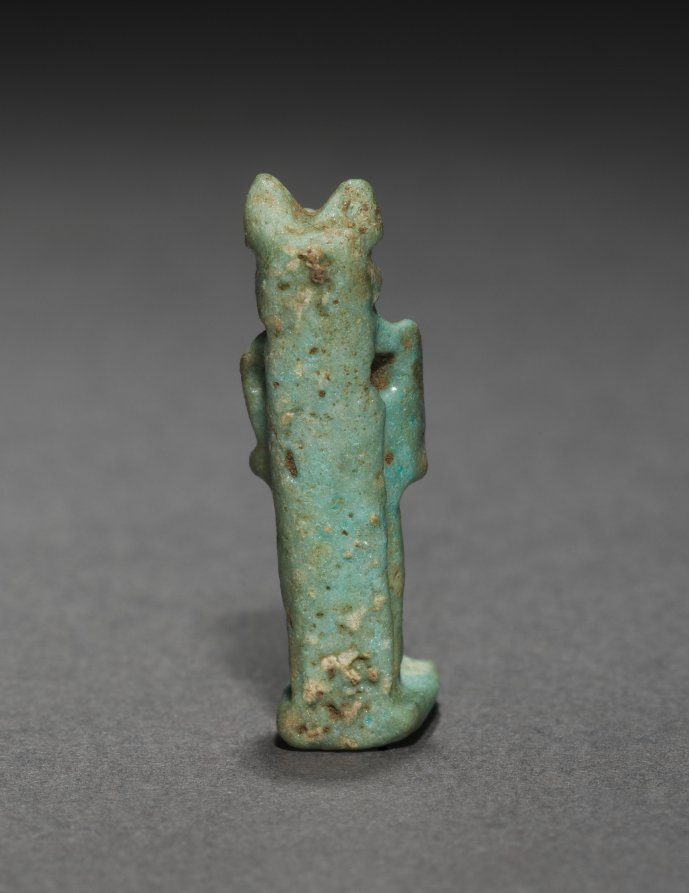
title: Amulet of Anubis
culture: Egypt, Greco-Roman period (332 BCE–395 CE), Ptolemaic dynasty (305–30 BCE)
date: 305–30 BCE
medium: light robin's egg blue faience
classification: Amulets